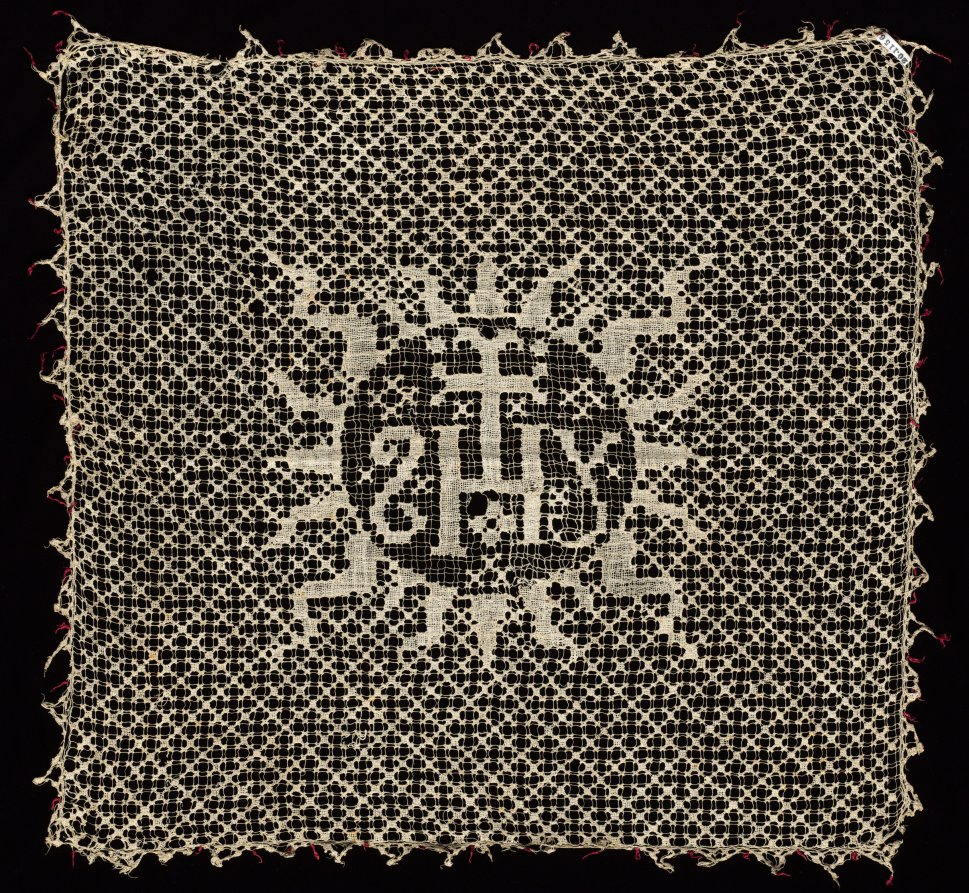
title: Chalice Veil with Monogram of Christ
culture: Italy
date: 1500s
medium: Bleached linen(?): needle lace (mezza mandolina) with red silk thread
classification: Lace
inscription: "I H S" in center.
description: This piece has been identified as a veil used to cover the chalice that holds the wine until the moment of communion in a Catholic Mass. The central monogram (IHS) abbreviates the name of Christ in Greek, surrounded by a circle of rays that indicate a holy symbol. The technique is of needle lace, knotted in an irregular pattern (mezza mandolina) and darned in two directions.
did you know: The monogram for Christ derives from the first three letters in his name in Greek – ΙΗΣΟΥΣ. The Greek letter Σ (sigma) is written as an “S” in English.